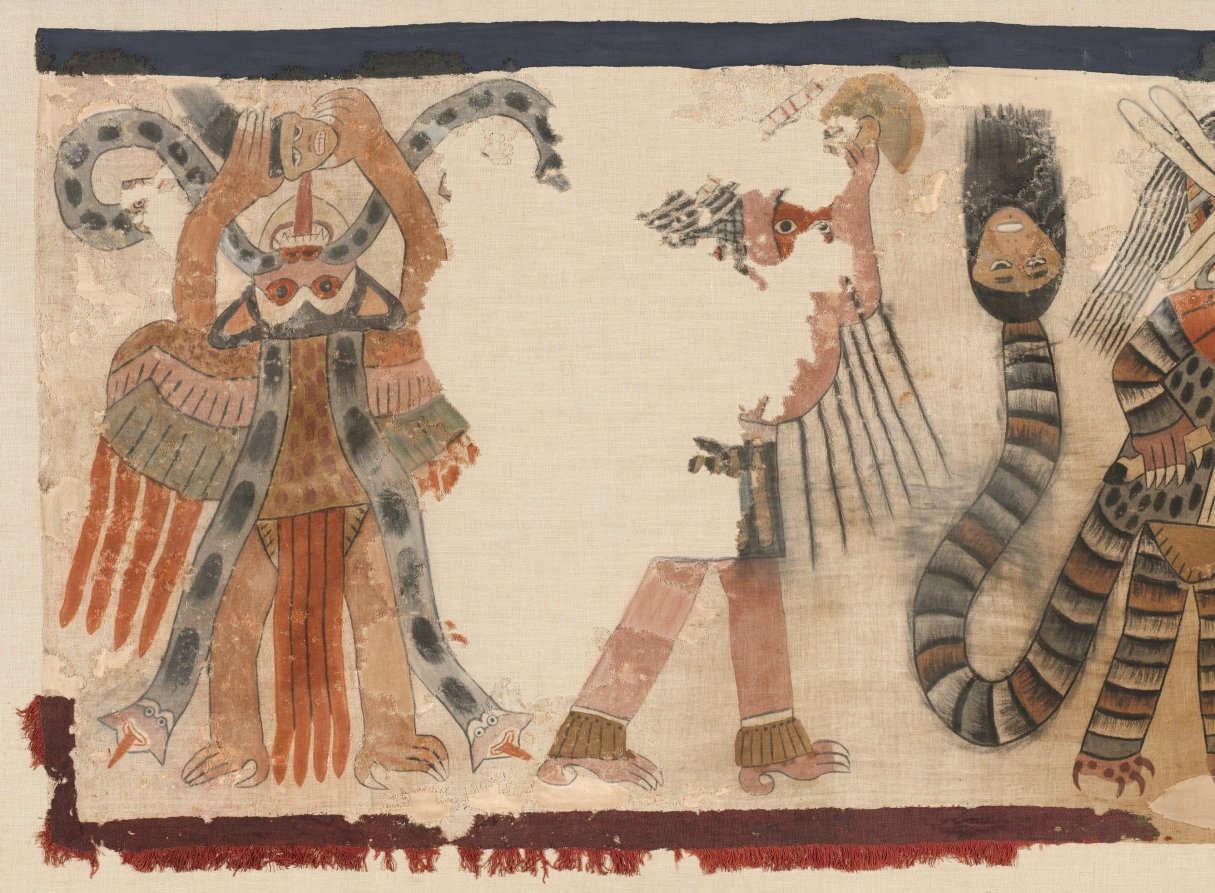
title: Cloth with Procession of Figures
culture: Central Andes, South Coast, Nasca people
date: 170 BCE–70 CE (radiocarbon date, 95% probability)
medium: cotton and pigment (field); camelid fiber (borders and fringe)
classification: Textile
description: Experts agree that this cloth is one of the greatest paintings to survive from Andean antiquity due to the realism, complexity, large size, and refined execution of its figures. All but one of the figures wear the whiskered mouth mask of Nasca supernatural beings and several carry or wear severed human heads, which the Nasca linked to nature’s fruitfulness. Thus, the figures seem to represent supernatural forces or humans personifying such forces during a ritual devoted to agricultural fertility. Originally, the panel was attached along its upper edge to a dark blue cloth of equal size. The complete textile may have served as a mantle (a shawl-like garment), a hanging, or a funerary offering.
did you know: Characteristics of the pampas cat and the emperor tamarin monkey are visible in the marching figures.